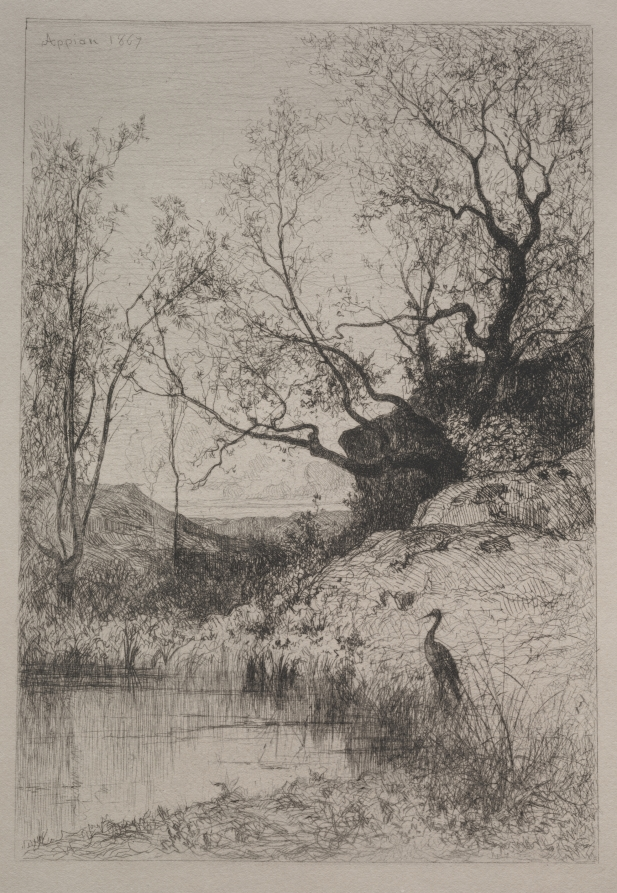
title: A Pond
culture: France, 19th century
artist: Adolphe Appian (French, 1818–1898)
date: 1867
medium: etching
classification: Print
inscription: upper left, in plate: Appian 1867